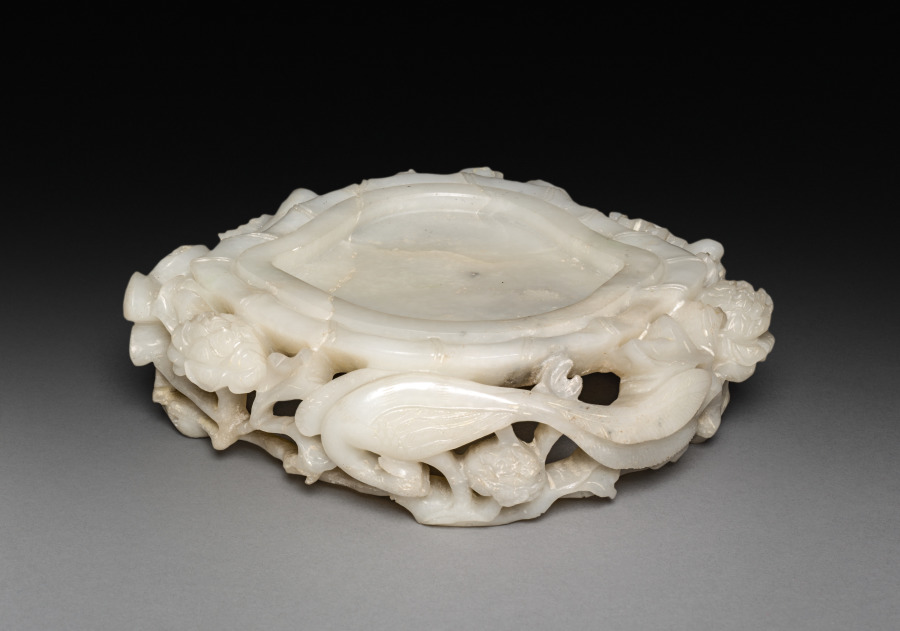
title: Three-Sectional Altar Group: Koro (bottom section of base)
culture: China, Qing dynasty (1644-1911)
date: 1644–1911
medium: jade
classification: Jade